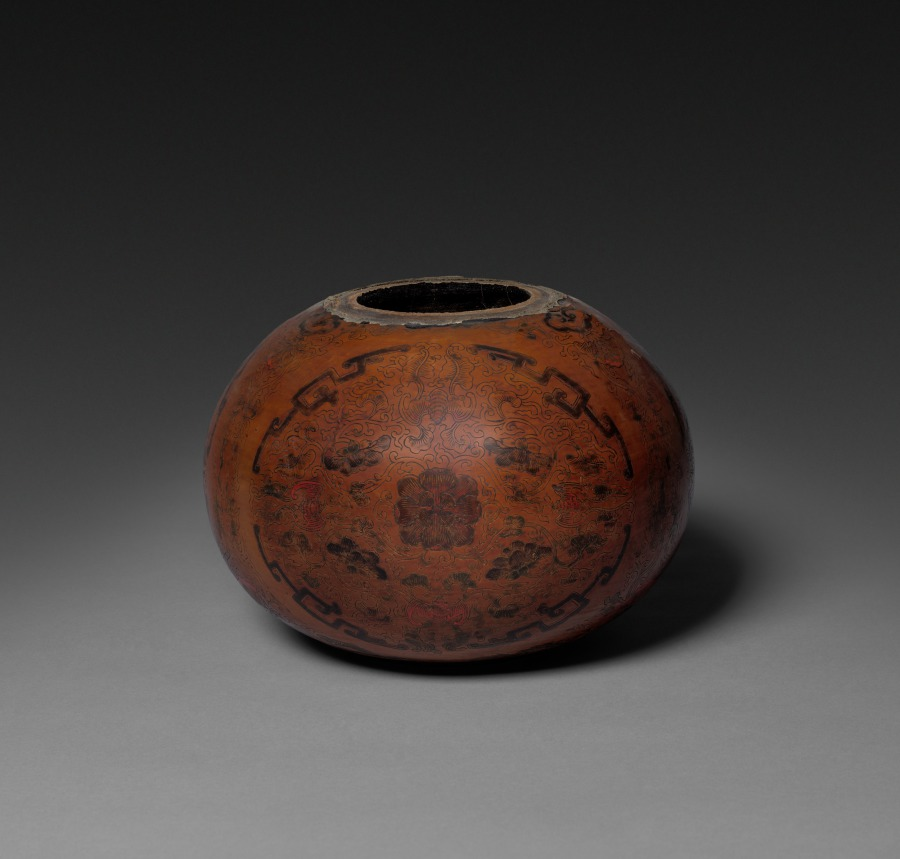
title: Vase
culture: China, Qing dynasty (1644-1911)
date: 1644–1911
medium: lacquered wood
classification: Lacquer